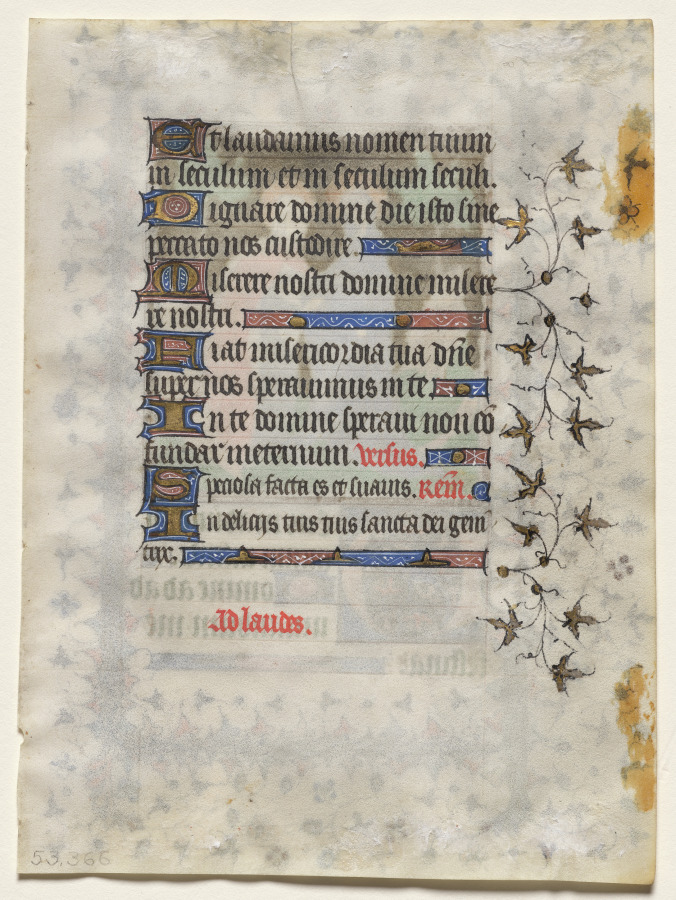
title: Leaf from a Book of Hours: The Visitation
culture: France, Paris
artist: workshop of Boucicaut Master (French, Paris, active about 1410–25)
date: c. 1415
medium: ink, tempera, and gold on vellum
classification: Manuscript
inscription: Deus in adiutorium meum intende. Domine, ad adiuvandum me festina.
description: The heart of every book of hours is the Hours of the Virgin. With this set of prayers, the reader asked the Virgin Mary to intercede on their behalf. The prayers come mostly from the Bible and include psalms, hymns, and readings. The Hours of the Virgin emerged from the eight “hours” of the day in the monastic world’s routine of daily prayers from daybreak to late at night. Originally used solely by the ordained, by the 1000s, these prayers had spread to the general population through their inclusion in books of hours. This section is traditionally illustrated by images from the life of the Virgin Mary, with each hour featuring a different event. The scene of the Visitation opens lauds, the prayers said at night or upon rising.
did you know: Highly customizable, the order of a book of hours shifts, and individual prayers vary, sometimes significantly, from region to region.